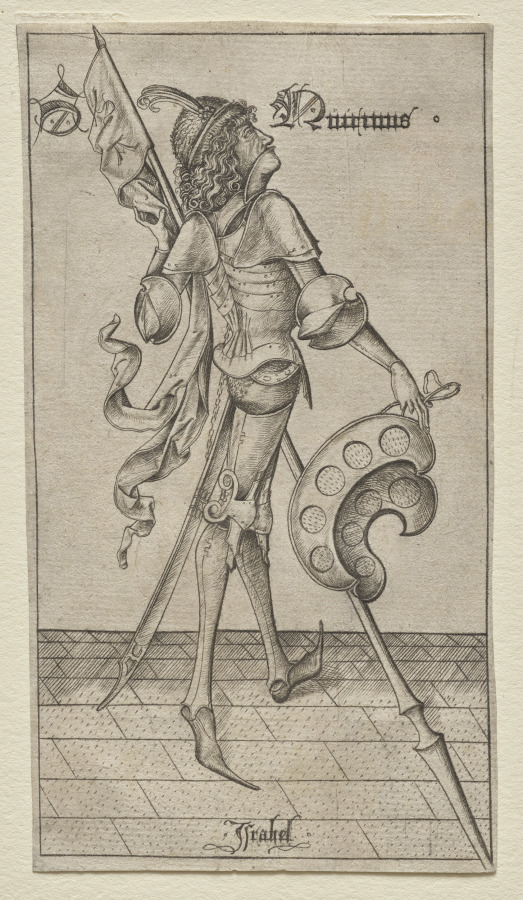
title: St. Quirinus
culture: Germany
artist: Israhel van Meckenem (German, c. 1440–1503)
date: c. 1475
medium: engraving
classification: Print